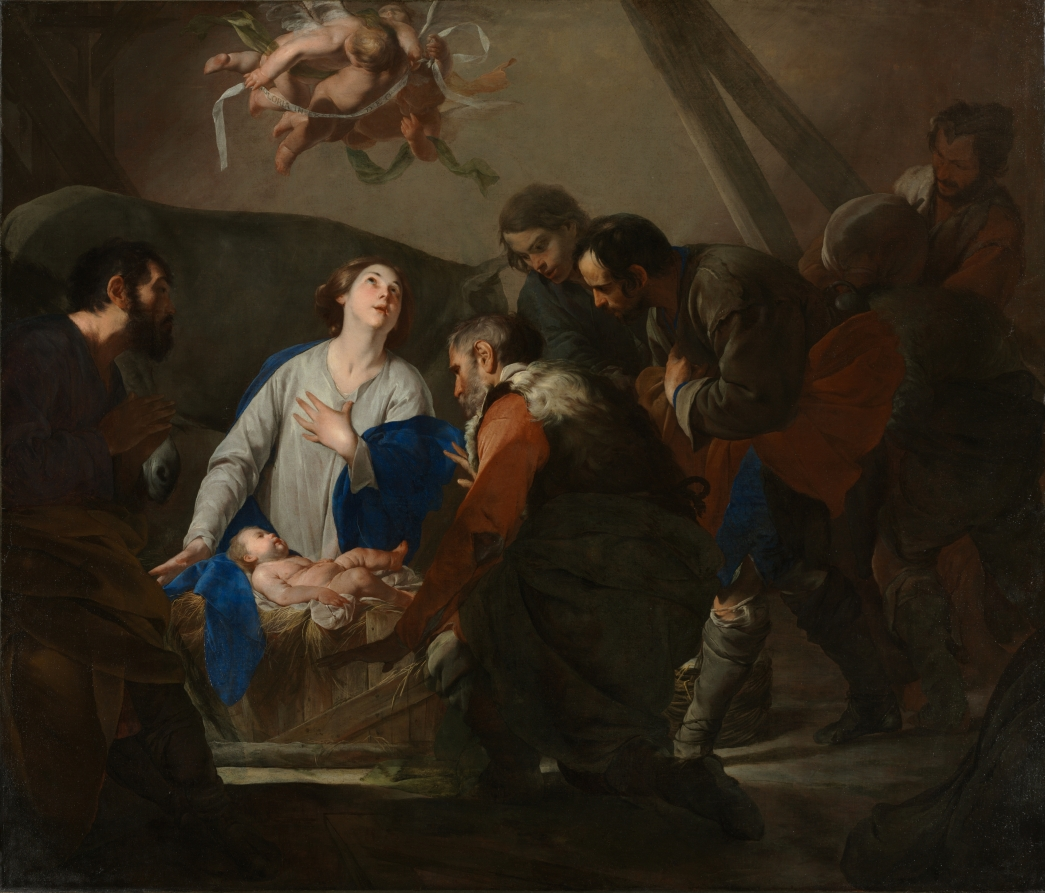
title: Adoration of the Shepherds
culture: Italy, 17th century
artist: Bernardo Cavallino (Italian, 1616–1656)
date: c. 1650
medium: oil on canvas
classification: Painting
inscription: Signed left on ox: "BC [monogram]"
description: Cavallino worked in Naples where he was not well known during his lifetime, but was alert to the work of contemporaries whose innovations he transformed with extraordinary delicacy and charm. The adoration of the shepherds is a traditional subject, but here Cavallino shows it in a new light. The focus is on Mary, indicating that she alone is aware of the angels who flutter above with ribbons proclaiming Gloria in Excelsis Deo (Glory to God in the highest). Joseph and the shepherds stolidly regard the child, but the sweetness of Mary's expression simultaneously reveals her love, pride, and humility.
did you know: The artist signed this painting with his monogram “BC” on the rump of the ox.